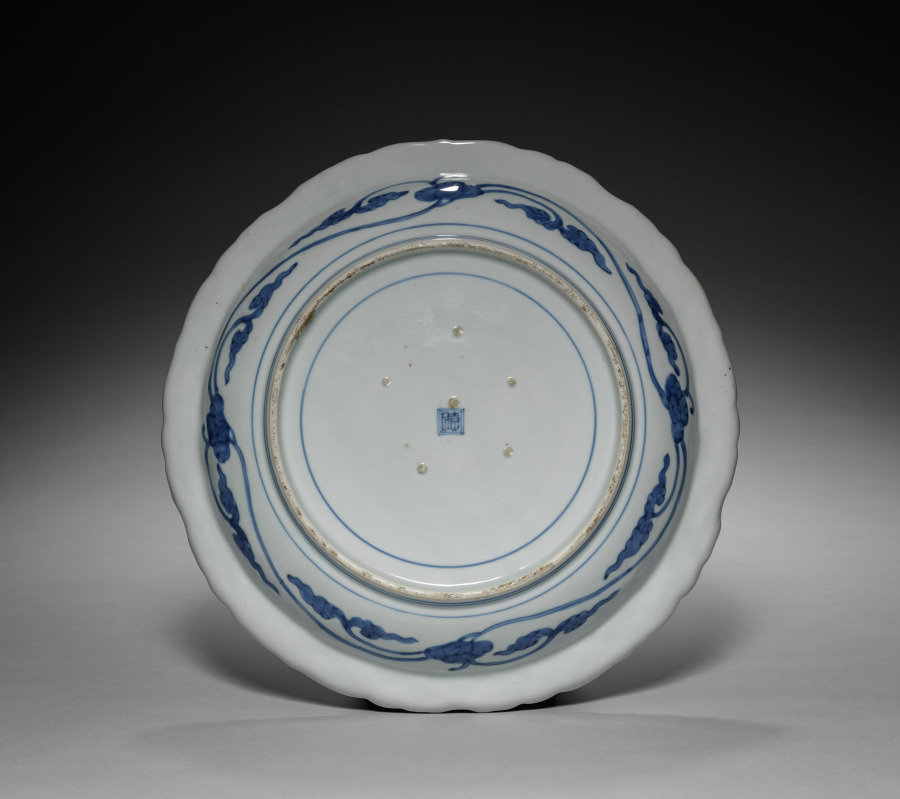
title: Large Dish with Landscape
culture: Japan, Edo period (1615–1868)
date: 1750s–80s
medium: porcelain with underglaze blue and molded decoration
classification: Ceramic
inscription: Seal on base illegible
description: The motif in the central medallion of this large dish depicts a knotted pine tree on the right with branches of pine needles forming triangular shapes resembling mountains in a distant landscape. Above and below the branches are three cloud bands in alternating light and dark washes of cobalt blue. In the foreground, a small blooming orchid reaches toward the left of the dish, balancing the gentle sway of the pine tree.